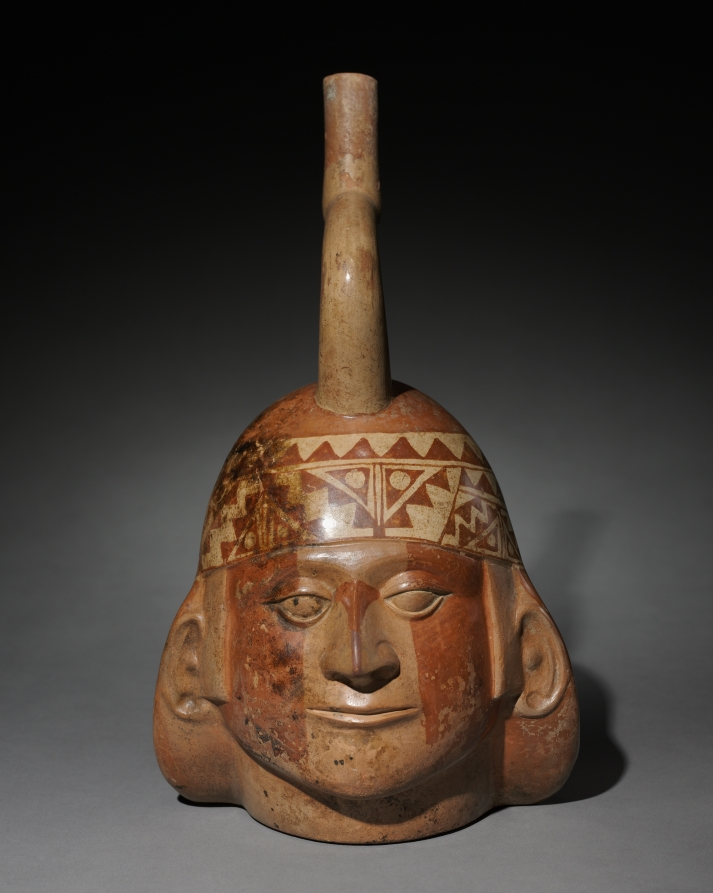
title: Portrait Head Vessel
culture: Peru, North Coast, Moche style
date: c. 200–550 CE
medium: earthenware with colored slips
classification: Sculpture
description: The Moche were unique in ancient Peru in creating realistic human portraits, usually in the form of ceramic vessels. In general, such vessels represent more than 750 individuals; identities are unclear but most are elite men, some probably rulers. The stirrup-shaped spout is a hallmark of Moche ceramic production.